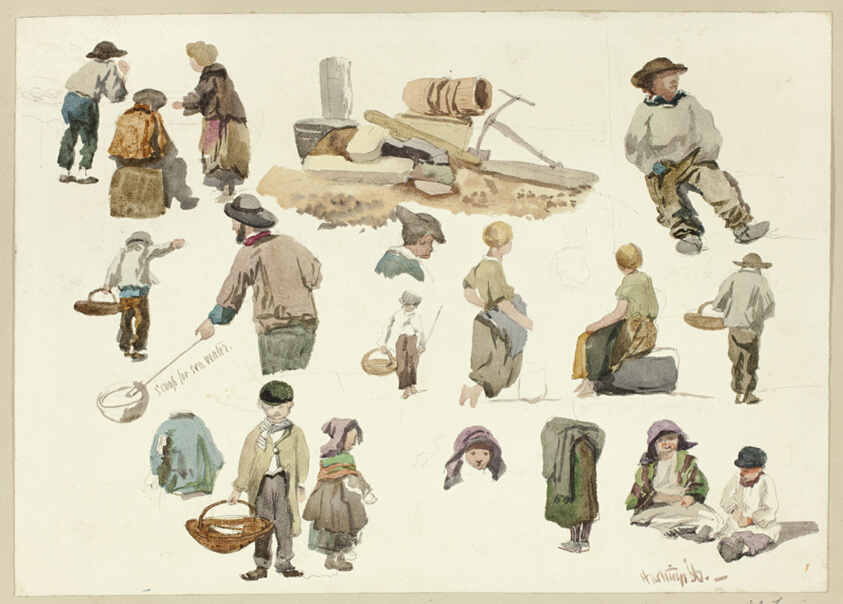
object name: Drawing and Watercolor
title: Sketches of Fishermen and Children at Hastings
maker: Unknown Artist; English, 19th century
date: 1866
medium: Watercolor over graphite, on ivory wove paper, tipped onto gray wove paper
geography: England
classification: watercolor; drawings (visual works); prints and drawing